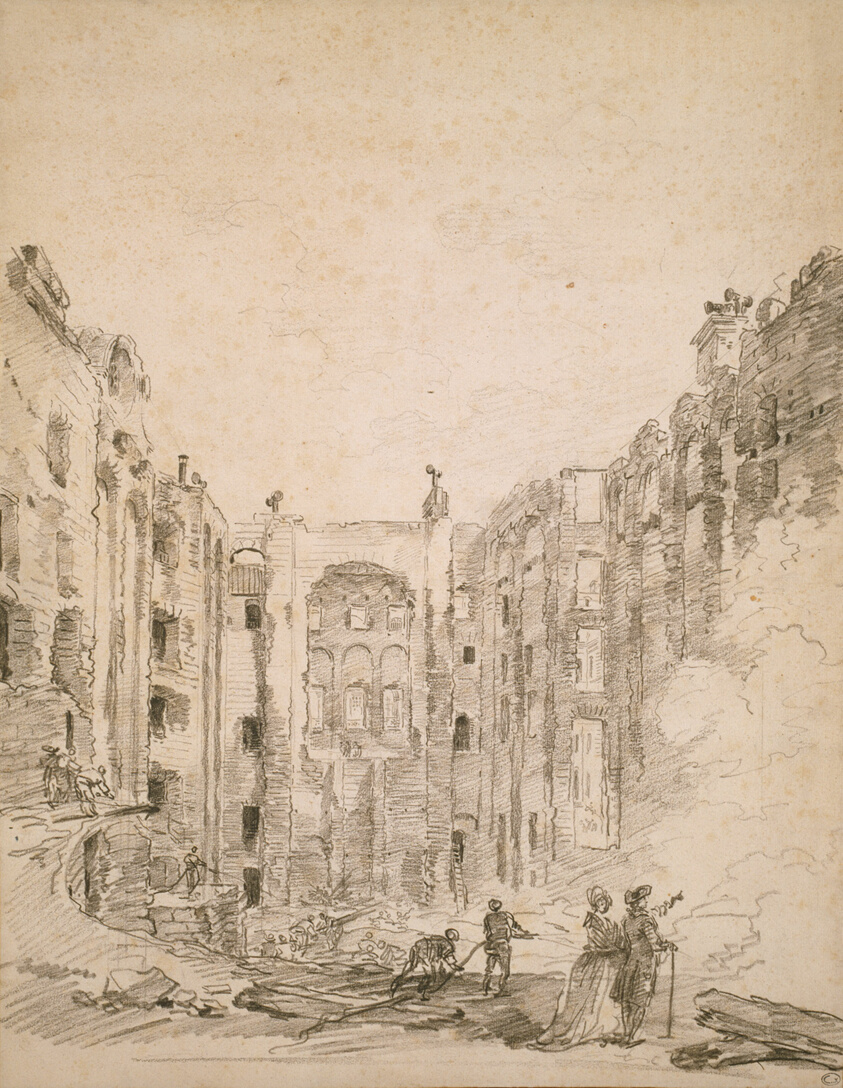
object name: Drawing and Watercolor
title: Ruins of the Opera After the Fire of 1781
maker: Hubert Robert (French, 1733-1808)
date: 1781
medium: Black chalk on ivory laid paper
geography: France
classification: chalk; drawings (visual works); prints and drawing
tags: cityscapes